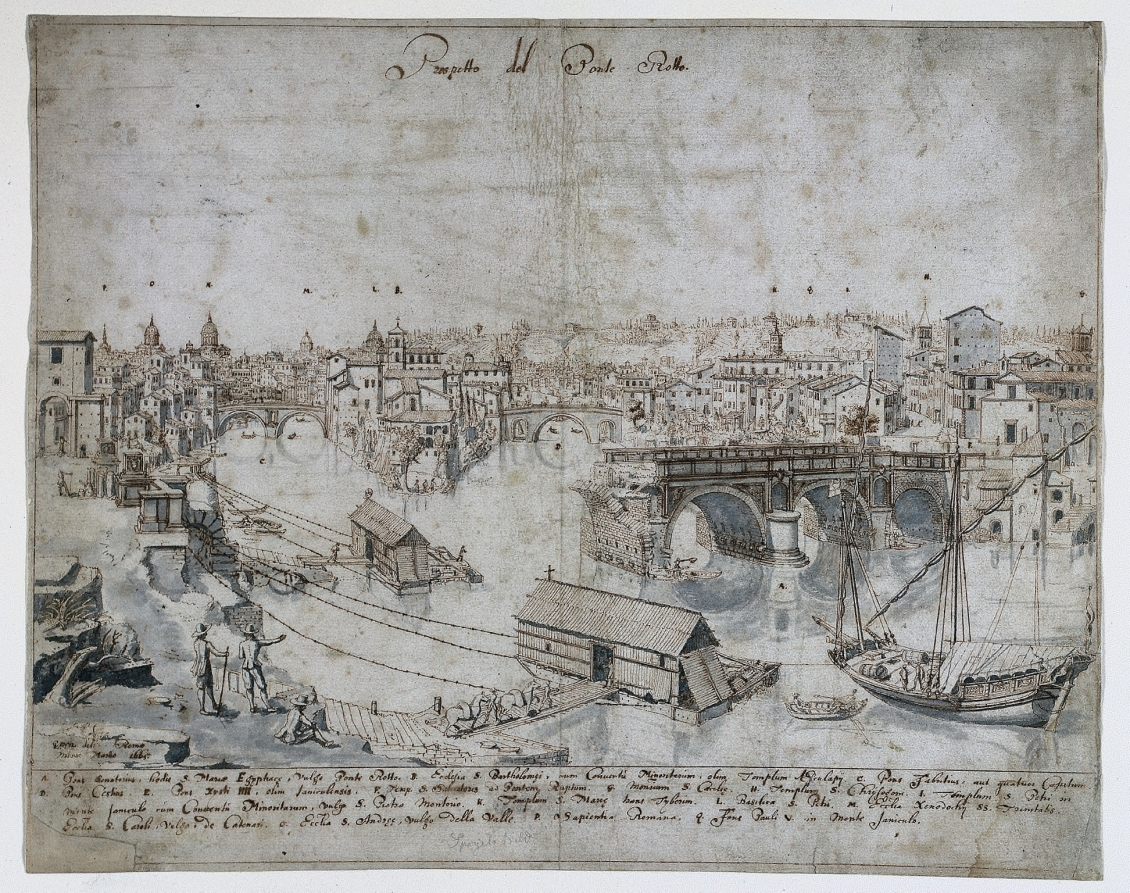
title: Eighteen Views of Rome: The Ponte Rotto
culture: Flanders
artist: Lievin Cruyl (Flemish, c. 1640-c. 1720)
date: 1665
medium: pen and brown ink and brush and gray wash over graphite; framing lines in brown ink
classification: Drawing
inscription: signed, lower left, in brown ink: [artist's monogram: LC] RVYL del: Romæ / mense Martio 1665. ; by artist, upper center, in brown ink: Prospetto del Ponte Rotto. ; by artist, throughout composition, in brown ink: [the letters A-Q] ; by artist, across bottom, in brown ink: A. Pons Senatorius, hodie S. Mariæ Egyptiacae, vulgo Ponte Rotto. B. Ecclesia S. Bartholomaei, cum Conventû Minoritarum, olim Templum Æsculapij. C. Pons Fabritius, aut quatuor Capitum. / D. Pons Cestius. E. Pons Xysti IIII, olim Janiculunsis. F. Temp. S. Salvatoris ad Pontem Rupium. G. Monrium S. Cæciliæ. H. Templum S. Chrijsogoni. I. Templum S. Petri in / Monte Janiculo cum Conventú Minoritarum, vulgo S. Pietro Montorio. K. Templum S. Mariæ trans Tyberim. L. Basilica S. Petri. M. Ecclia Xenodochij SS. Trinitatis. / [N.] Ecclia S. Caroli, vulgo, de Catenari. O. Ecclia S. Andreæ, vulgo della Valle. P. Sapientia Romana. Q. Fons Pauli V. in Monte Janiculo. ; lower center, in graphite: Spiegel Bild ; VERSO, upper left, in brown ink: [illegible] [partially masked] ; ON STRIPS OF PAPER MOUNTED TO VERSO, lower center, in graphite: A20986 ; lower right, in graphite: E. 15